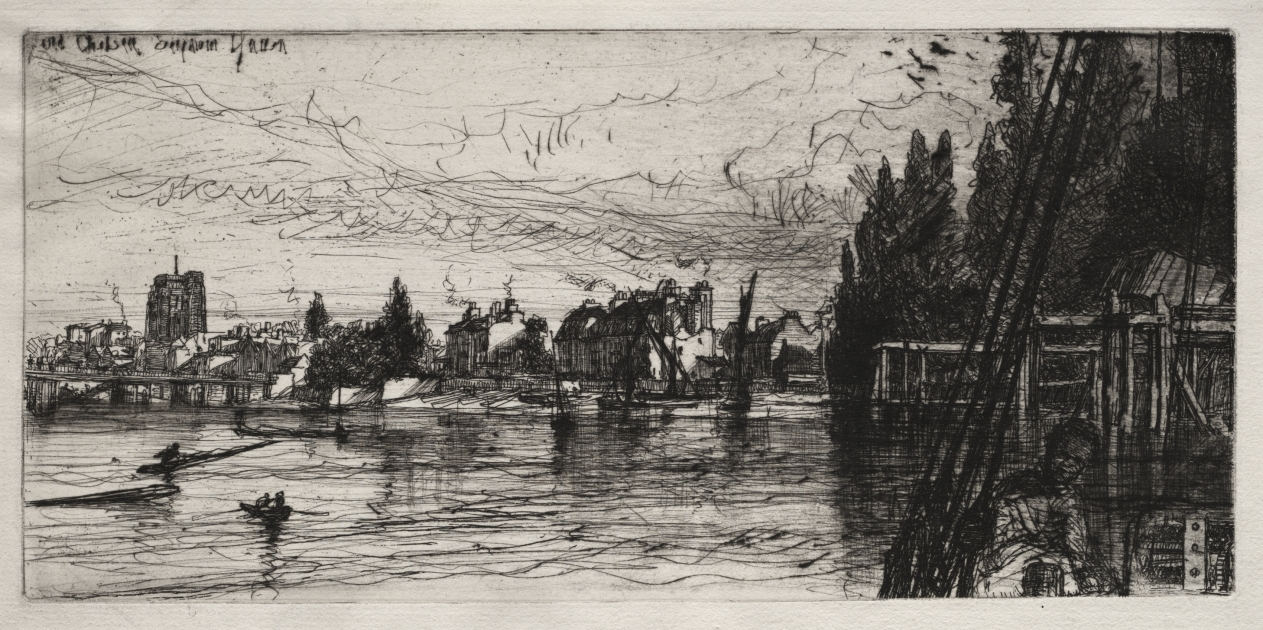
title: Old Chelsea Church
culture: England, 19th century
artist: Francis Seymour Haden (British, 1818–1910)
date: 1865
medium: etching and drypoint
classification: Print